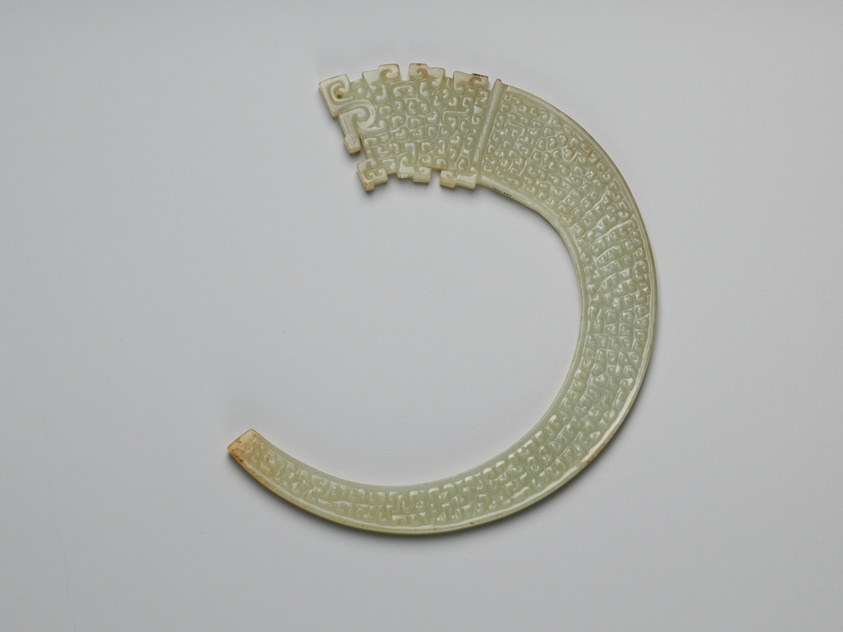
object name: Religious/Ritual Object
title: Dragon Pendant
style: Chinese (culture or style)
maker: China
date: Eastern Zhou dynasty ( c.770–256 B.C.), 6th century B.C.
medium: Jade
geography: China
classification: pendant (jewelry); jade; asian art; ritual objects